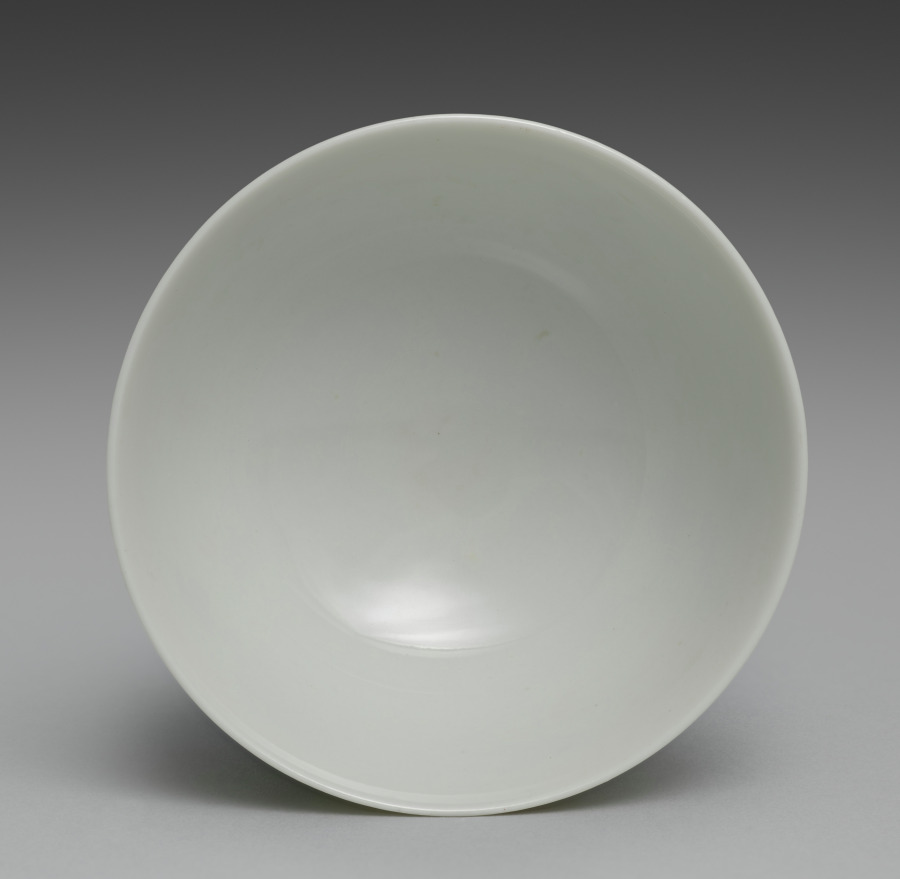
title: Teabowl from Teabowls with Peony and Crabapple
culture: Japan, Meiji period (1868–1912)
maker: Seifū Yohei III (Japanese, 1851–1914)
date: 1893–1914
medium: One from a set of five teabowls; porcelain with underglaze and overglaze color enamels and gold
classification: Ceramic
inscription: 清風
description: Overglaze color enamels are generally called iro-e (literally “color picture”) in the terminology customarily used for porcelain decoration of the Edo period. This set of teabowls is a fine example of Yohei III’s skilled use of the technique, which is identified on this set’s box lid with the alternate phrasing “porcelain with color painting” (jisaiga). Distinct from the way overglaze colors were used in Kakiemon ware from Arita, his designs and applications show a consciousness of porcelain decoration of the Qing dynasty. Here, he combines Chinese models with a sensibility taken from Kyoto ware precedents, including painting with powdered gold (kinrande). The colors used in the bowls are as follows: blue, black, gold, white, light green, green, and pink. The blue appears only inside the footring, as a double band of underglaze color. The black iron, used for stems and leaf veins, is painted over the glaze. The gold, also painted over the glaze, is used for leaves and the centers of flowers, for solid, glossy lines defining detail, or as a semimatte ground. The white of the peony flower is built up to a low relief over the glaze. Yohei has incised lines of varying widths into the pigment, carving away to the bowl’s surface, to differentiate individual petals and their rippled shapes. The light and dark greens, as well as the pink, are painted over the glaze. Of note is how Yohei has first used thinly applied lines of light green to draw the plum branch before applying the opaque iron black. For the plum buds and flowers, he has used a diluted pink with an opaque pink for outline, both over the glaze. In his later works, Yohei used pink both over and under the glaze in a manner similar to underglaze blue, and it can be challenging in some cases to discern which technique he has used. A lidded container in a private collection has a similar design but is augmented with the inclusion of white and purple magnolia blossoms. In contemplating the original decorative program of a set, of which these teabowls may have been a part, it is worth considering that perhaps not all objects included the full range of motifs. In such cases, the composition of the individual object may be best understood within the context of the extended ensemble. Here, the delicate pink plum on one side of the bowl seems slightly unbalanced with the bold white peony on the other, but when seen with other objects with the magnolia and its additional colors and shapes, it is possible to imagine a set with a complex, balanced design across multiple pieces.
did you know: Because four is considered an unlucky number, it became customary to assemble groups of guests of five or multiples of five.